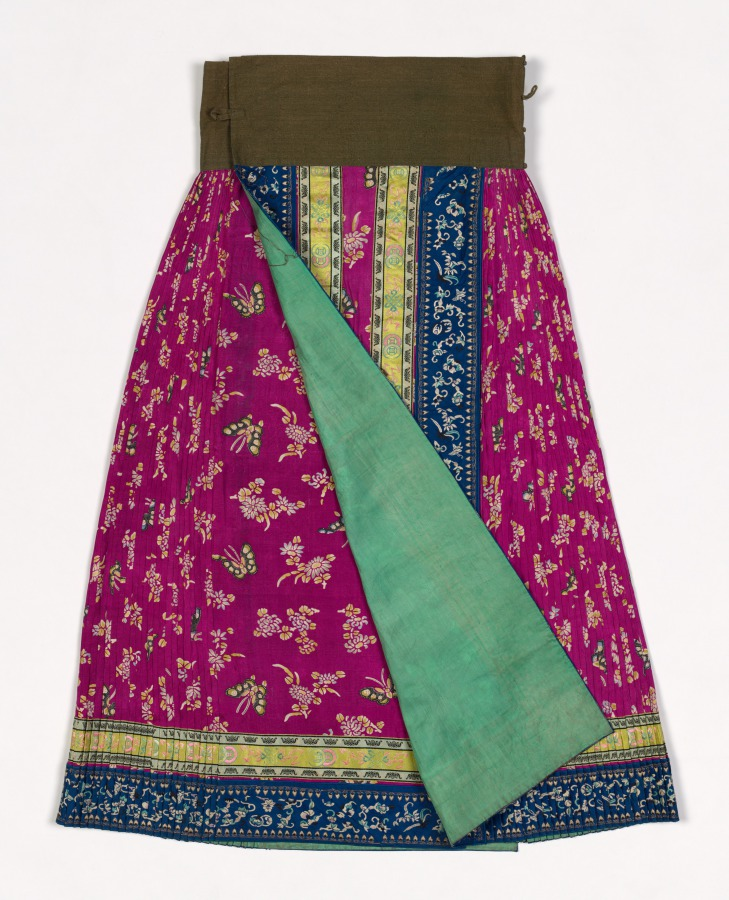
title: Skirt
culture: China, Late 19th century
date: c. 1875–1900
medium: embroidered silk, wool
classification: Garment